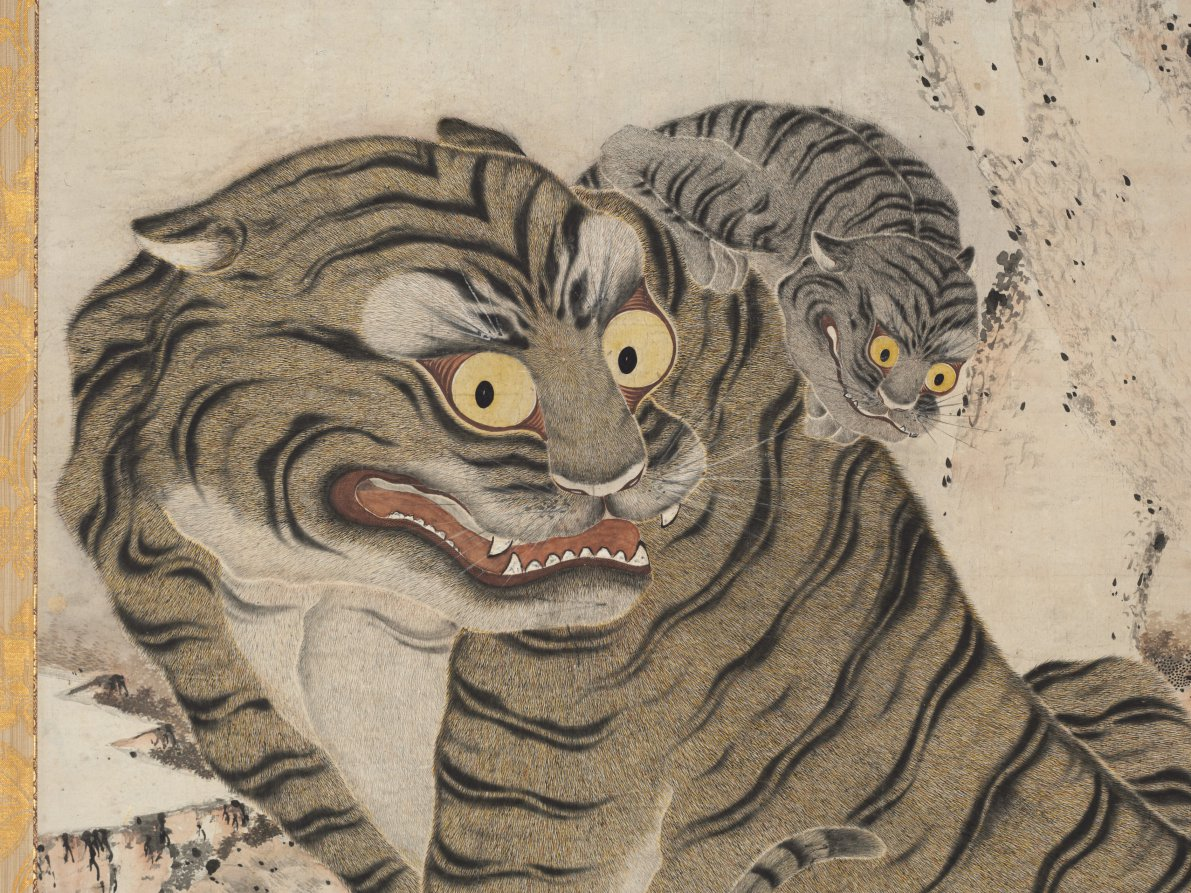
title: Tiger Family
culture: Korea, Joseon dynasty (1392–1910)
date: late 1800s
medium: hanging scroll; ink and color on paper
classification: Painting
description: In deep mountains, a tigress, two cubs, and a leopard welcome the early morning sun. This is not merely a playful scene but a well calculated image with symbols of longevity (pine trees), prosperity (tigress and cubs), and good fortune (leopard). Traditionally, on New Year’s Eve, the image of a fearsome-looking tiger was pasted on entrance doors to ward off evil spirits. Conventional Korean tiger paintings often include frolicking magpies, but here, the crimson sun is placed behind a majestic pine. Through the sunrise and the details of the felines’ skin shines the artist’s keen interest in creating a realistic atmosphere.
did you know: A great number of tigers used to have live in the Korean peninsula. An old Chinese proverb says: “Korean people hunt tigers half of the year, and tigers hunt people other half of the year.”